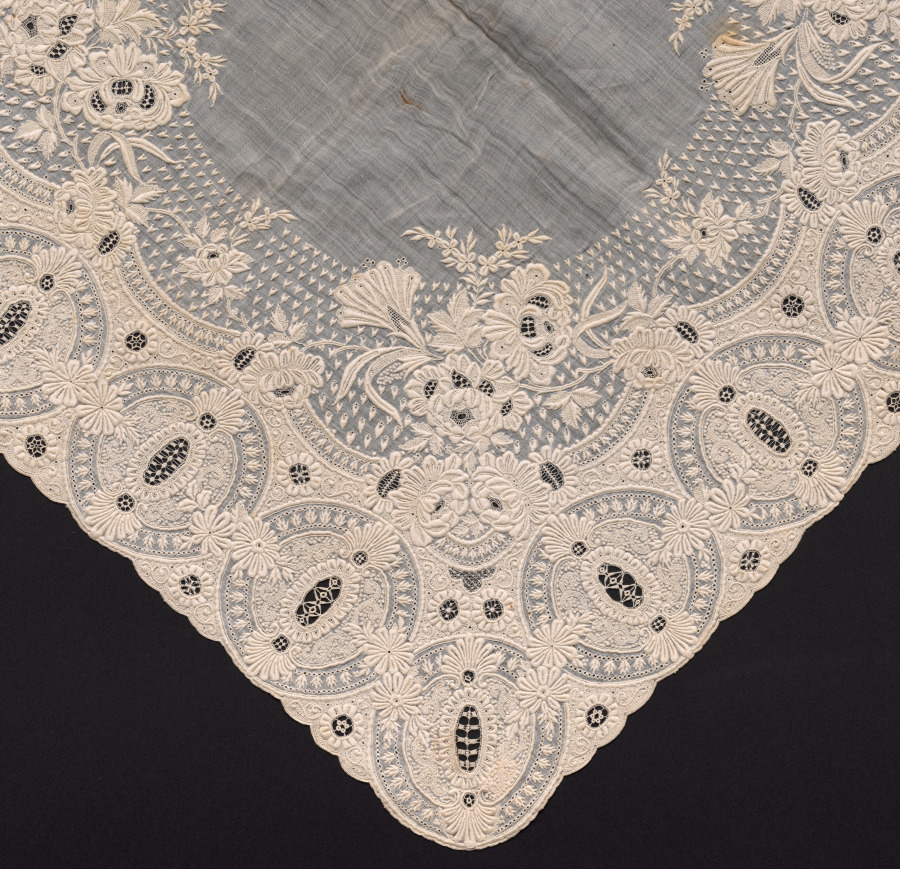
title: Lace Handkerchief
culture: France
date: 1800s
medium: Plain weave linen center: linen embroidery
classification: Embroidery